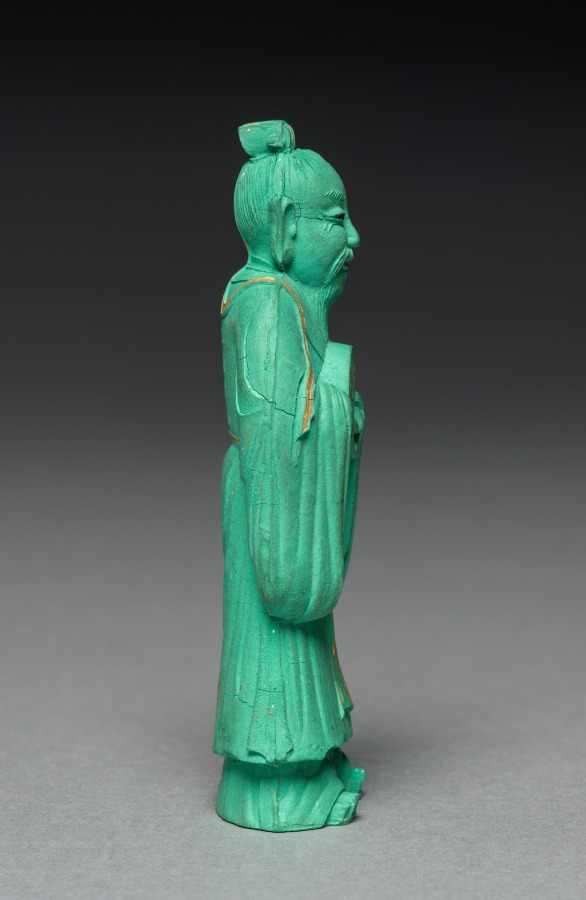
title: Ink Cake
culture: China, Qing dynasty (1644-1911)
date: late 19th Century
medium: ink cake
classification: Miscellaneous